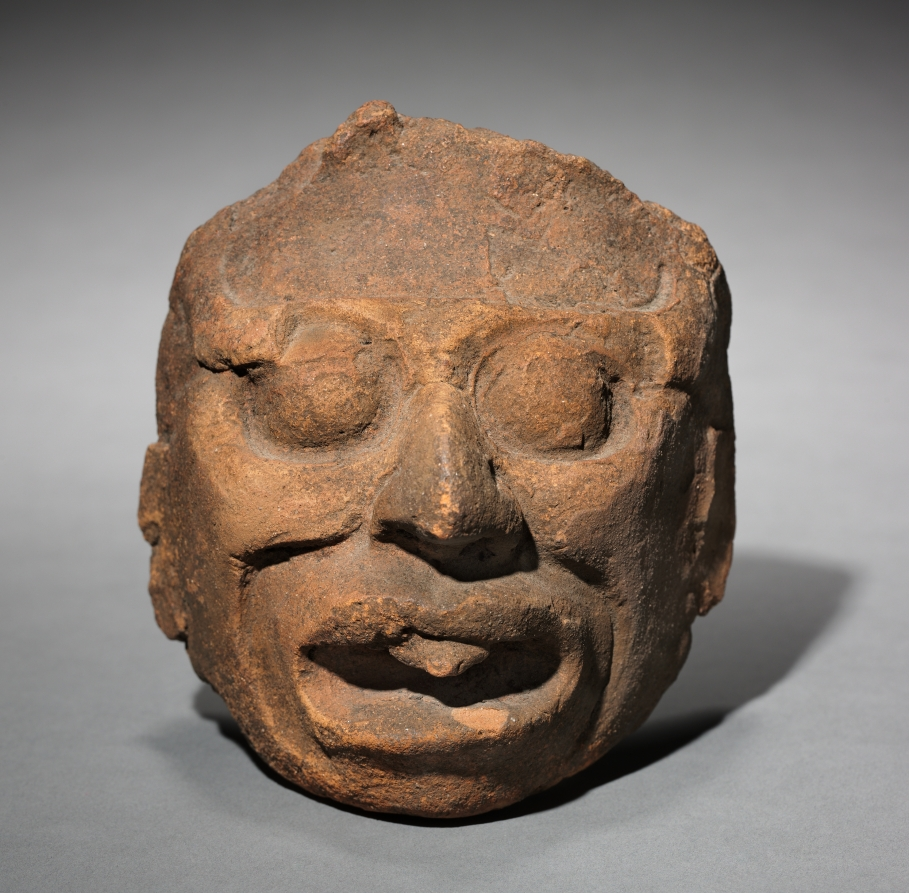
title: Face Fragment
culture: Mexico, Palenque region(?), Maya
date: 600–1000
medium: molded pottery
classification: Sculpture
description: This thick, heavy ceramic face fragment may come from an incensario (incense burner). Several features, including the tau- or T-shaped front teeth, suggest it represents a deity known today only as G1 due to difficulties in translating its Maya name, which is recorded in hieroglyphs. The deity’s meanings are equally elusive, though it seems to be associated with both the sun and water.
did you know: G1’s distinctive tooth was perhaps inspired by a 63 million-year-old fossilized shark tooth.